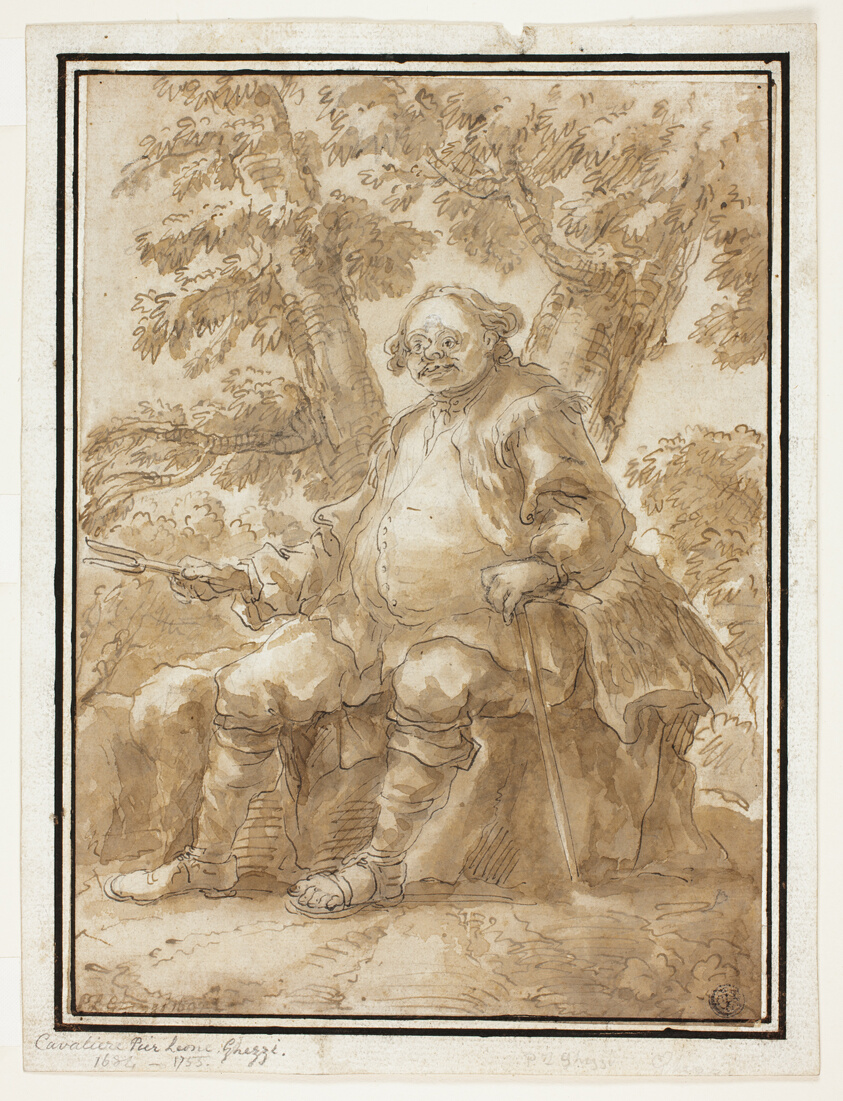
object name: Drawing and Watercolor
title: Man Seated in Front of Trees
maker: Carlo Marchionni (Italian, 1702-1786); or Pier Leone Ghezzi (Italian, 1674-1755)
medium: Pen and brown and black ink with brush and brown wash, with black chalk and graphite, on ivory laid paper, laid down on ivory laid paper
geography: Italy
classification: ink or chalk wash; drawings (visual works); prints and drawing